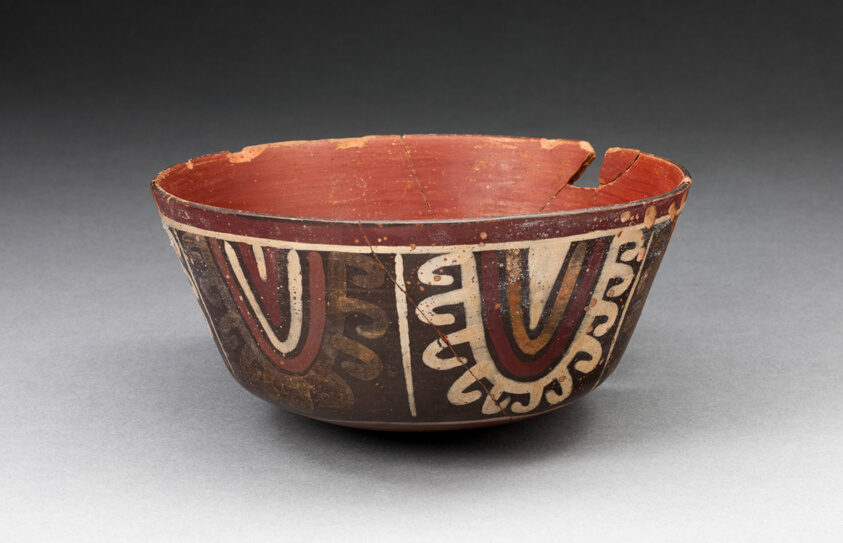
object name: Vessel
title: Bowl with Concentric Half-Circle Motifs Descending from Rim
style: nazca, early intermediate period, Pre-Columbian, americas, Arts of the Americas, andean, andes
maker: Nazca; South coast, Peru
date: 180 BCE–500 CE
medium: Ceramic and pigment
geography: Nazca Valley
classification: bowl; earthenware; art of the americas; ceramics; vessel